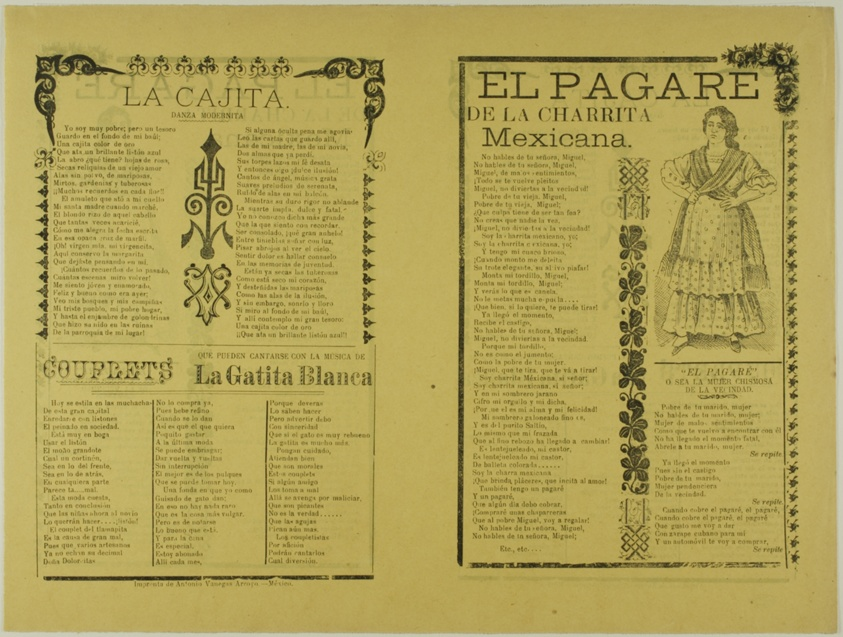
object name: Print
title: El pagare de la charrita mexicana (The Promissory Note of La Charrita Mexicana)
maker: José Guadalupe Posada (Mexican, 1852-1913)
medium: Relief print on paper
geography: Mexico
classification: relief etching; print; prints and drawing